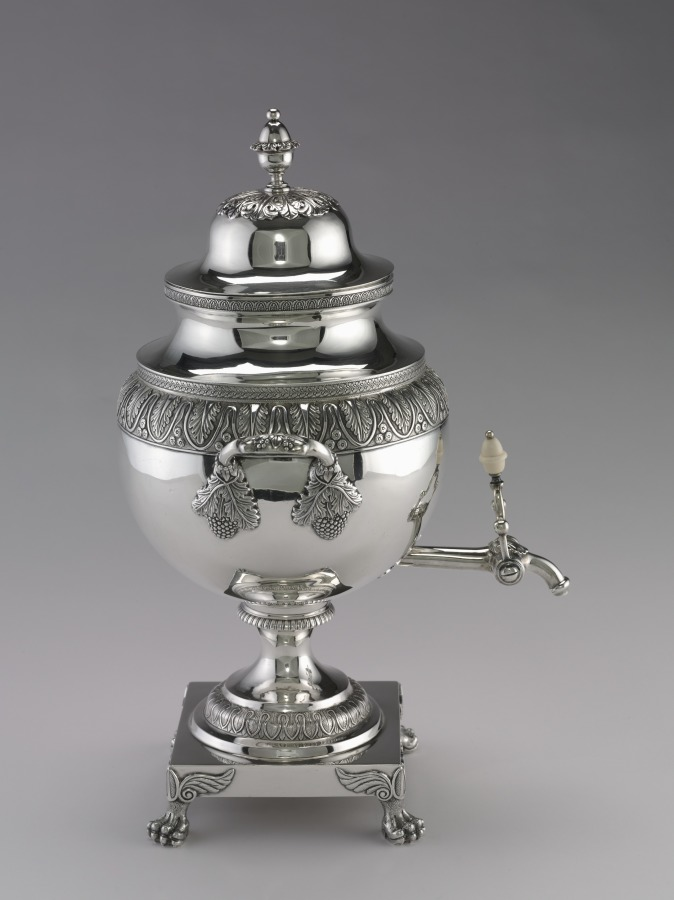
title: Tea Urn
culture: America, Pennsylvania, Philadelphia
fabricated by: Harvey Lewis (American, 1835)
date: 1811–25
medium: silver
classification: Silver